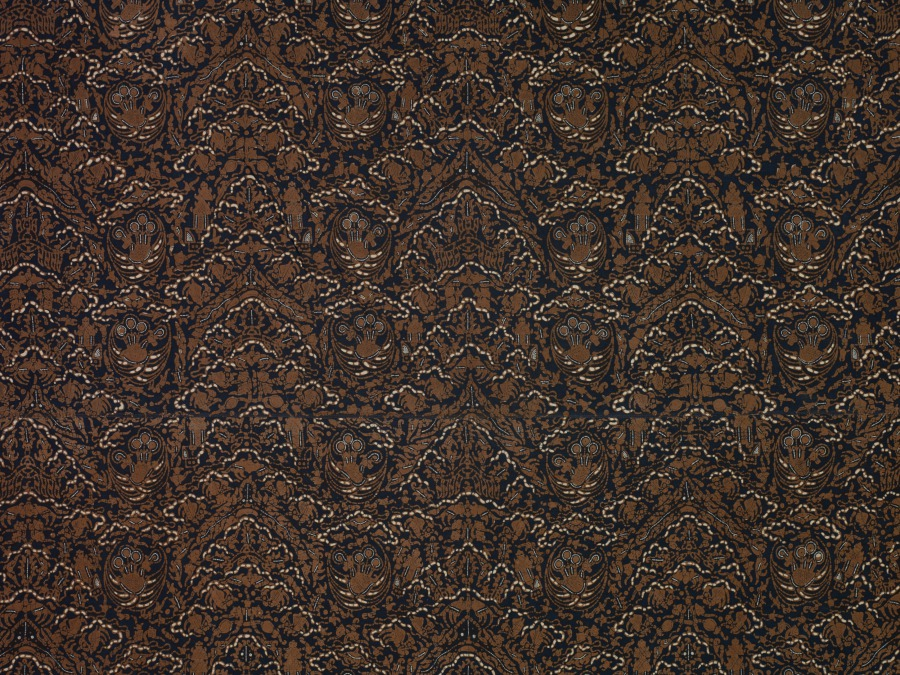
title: Ceremonial Cloth (Kampo)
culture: Indonesia, Central Java, 19th century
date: 1800s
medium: batik; cotton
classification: Textile